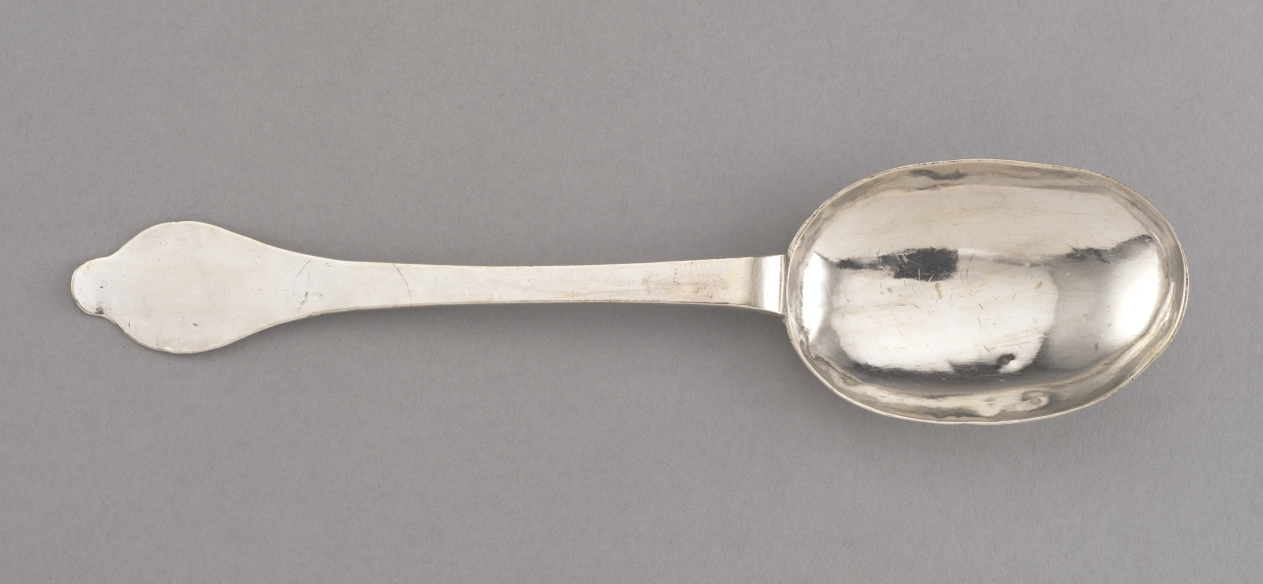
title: Tablespoon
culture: America, New York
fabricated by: Jacob Boelen I (American, 1654–1729)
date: 1700–1720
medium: silver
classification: Silver